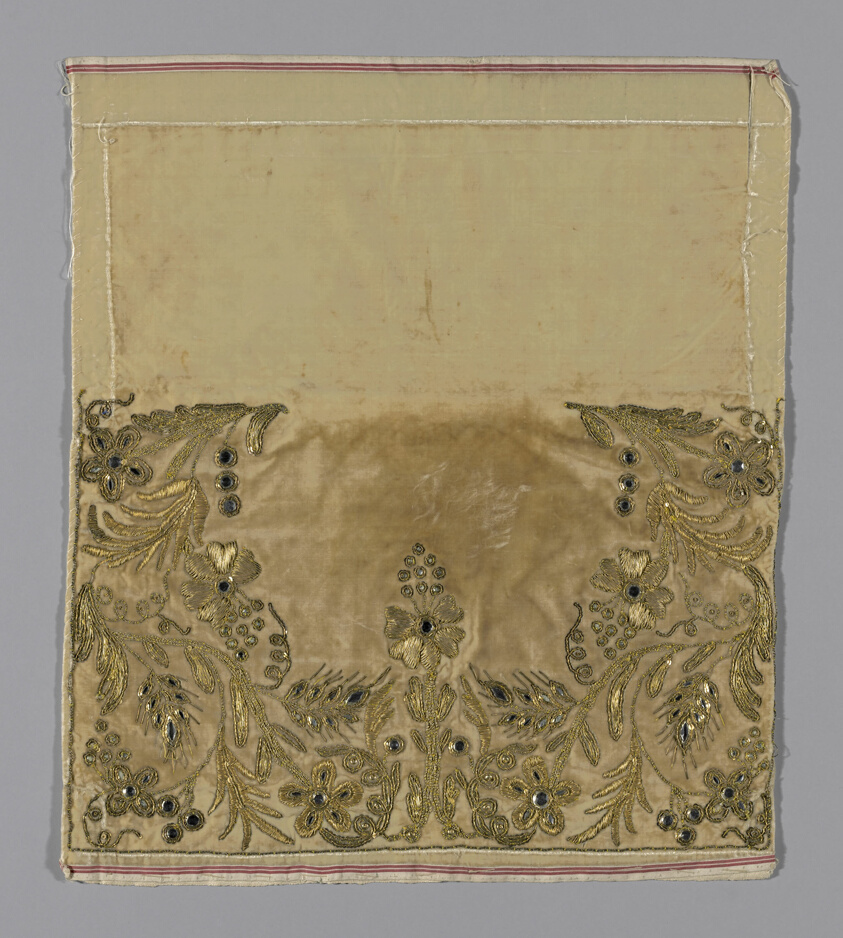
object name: Textile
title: Panel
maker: France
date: c. 1850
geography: France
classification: textile; needlework (visual works)